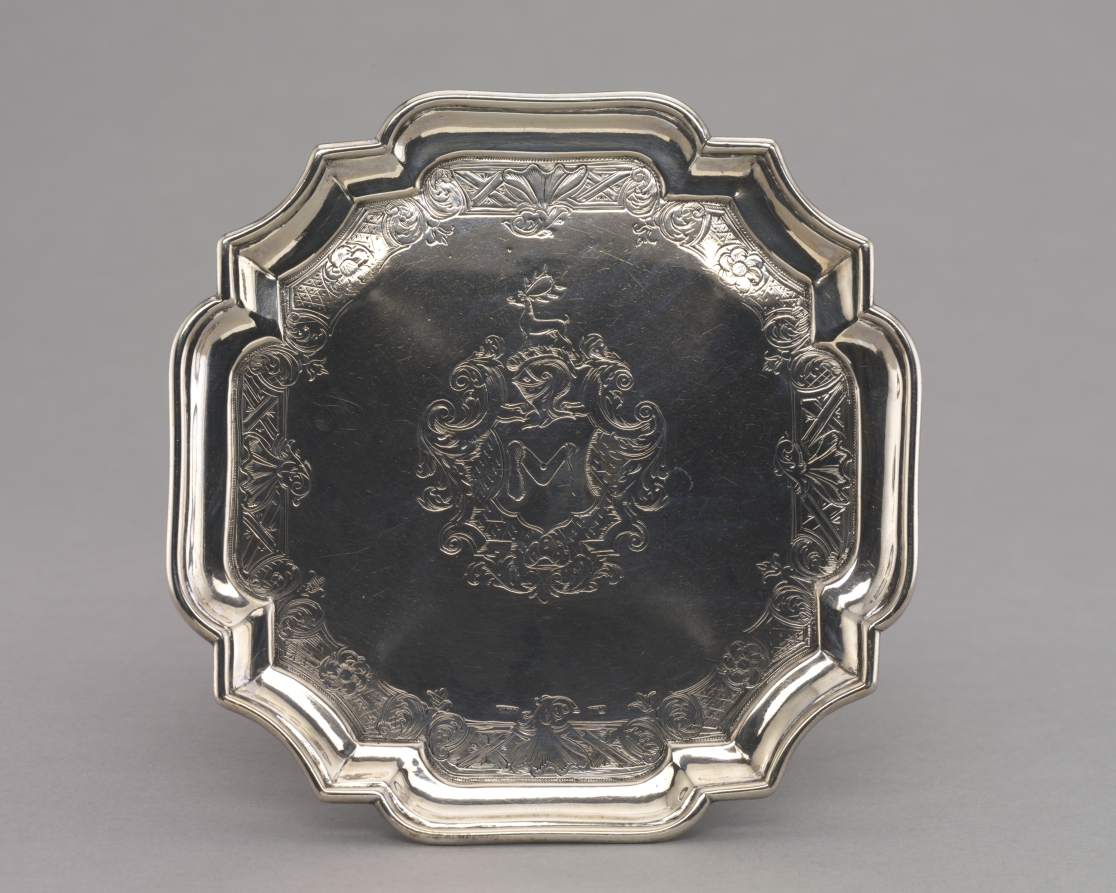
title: Salver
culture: America, Massachusetts, Boston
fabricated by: Jacob Hurd (American, 1702–1758)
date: 1740–50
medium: silver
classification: Silver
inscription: engraved: H over A + T over 1750 in shaded block letters underneath each salver.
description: The coat of arms is that of the Hastings family, the original owners of these serving pieces.